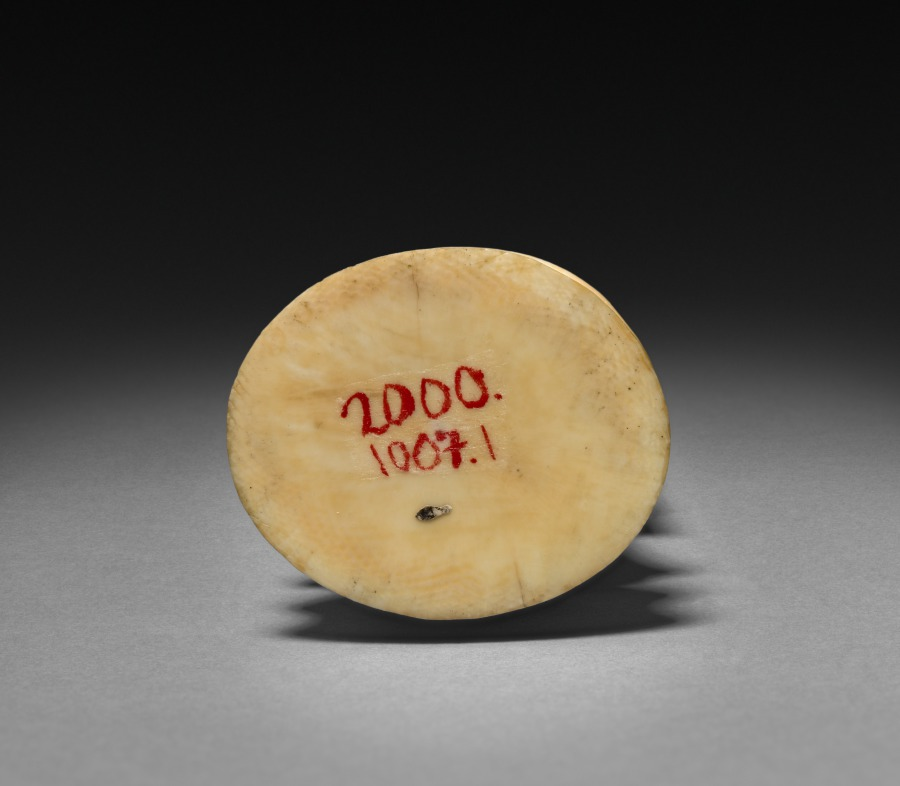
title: Chess Piece: King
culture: Japan, Meiji period (1868–1912)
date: early 1900s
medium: ivory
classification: Ivory